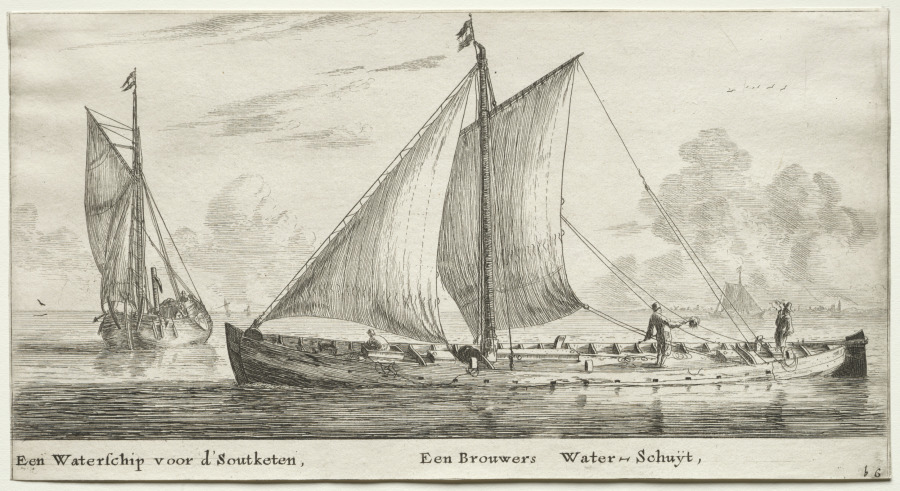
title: Various Ships and Views of Amsterdam (Verscheÿde Schepen en Gesichten van Amstelredam), Part II: A Water-ship bound for the Soutketen. A Brewer's Water-ship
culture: Netherlands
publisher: Clement de Jonghe (Dutch, 1579–1679)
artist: Reinier Nooms, called Zeeman (Dutch, c. 1623–1664)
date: 1652–54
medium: etching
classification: Print